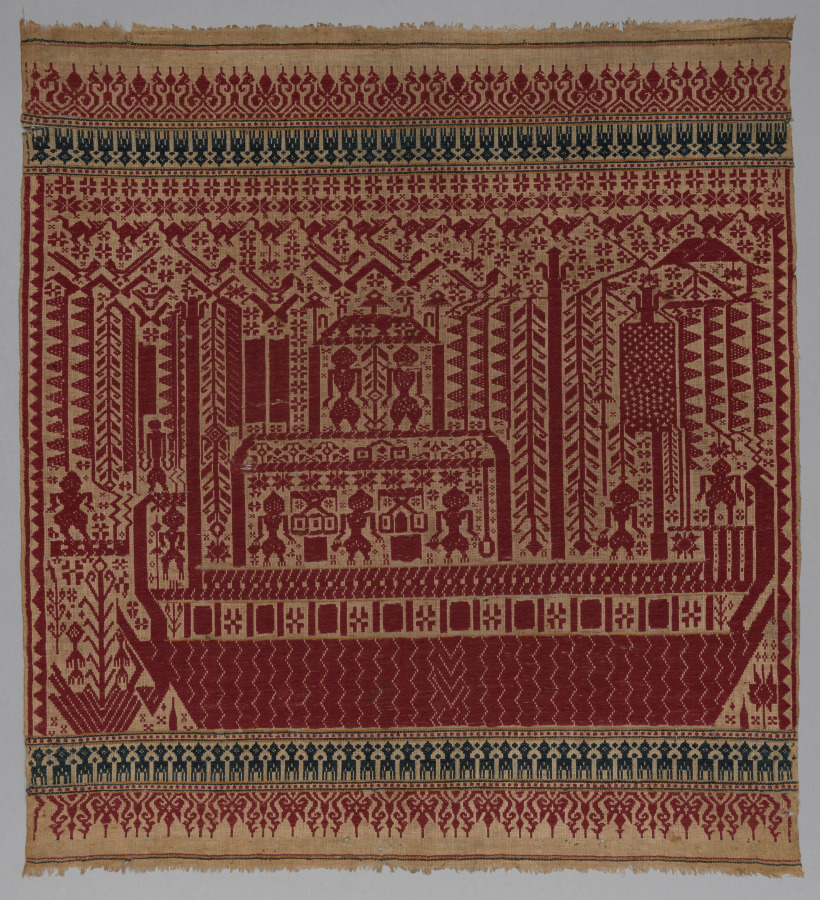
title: Tampan Pasisir (Ship Cloth)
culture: Indonesia, Sumatra, Lampung, 19th century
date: 1800s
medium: tabby weave with supplementary weft; cotton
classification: Textile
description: For several hundred years, until early in the present century, textiles of this type played an essential, symbolic role in virtually every southern Sumatran ritual. Since there is no written mythological literature in Indonesia, the exact meaning of the "tampan pasisir" (as this ritual cloth is called) remains unknown. Nevertheless, this fine weaving must be a kind of narrative. Ships, of course, were essential to the life of these island people, and using one as an image for safe passage from one of life's stages to another seems plausible. This rare piece--few textiles of its age and condition from the tropical climes of Indonesia survive--was a most welcome gift to The Cleveland Museum of Art from the Textile Arts Club in honor of its 50th anniversary.